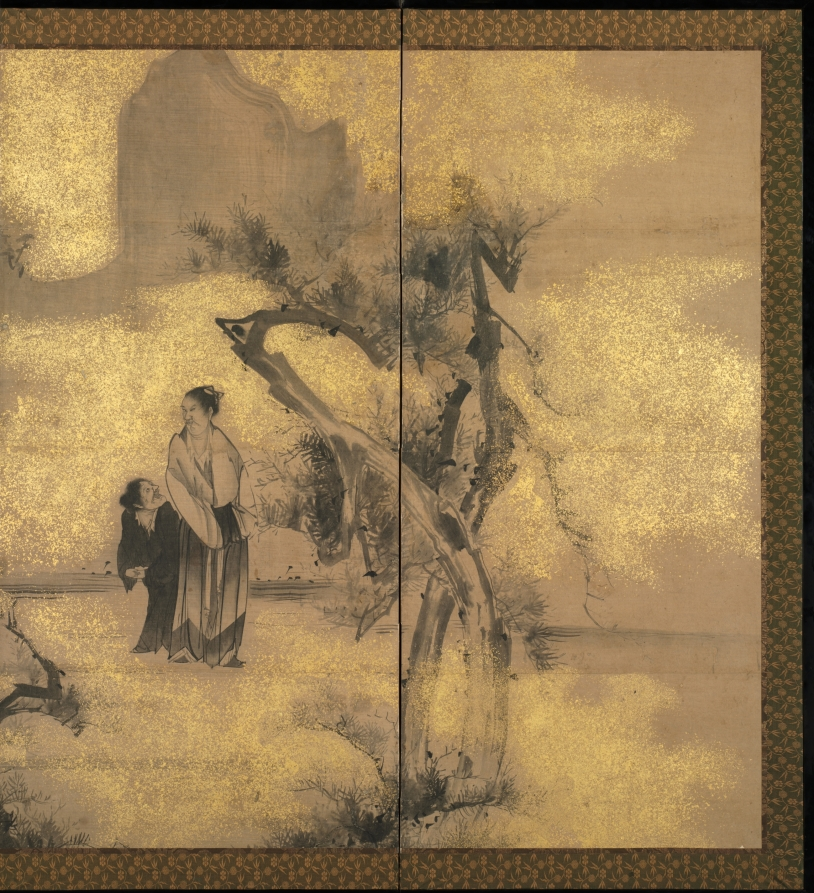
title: The Eight Immortals of the Wine Cup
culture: Japan, Edo period (1615–1868)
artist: Soga Shōhaku (Japanese, 1730–1781)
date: later 1700s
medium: six-panel folding screen, ink and cut-gold foil on paper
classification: Painting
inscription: signature upper left corner.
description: Responding to the desires of the middle class (chonin), some Japanese painters of the late Edo period moved away from the seriousness associated with the Chinese theme of reclusion, focusing instead on the motif’s humorous aspects. The theme Eight Immortals of the Wine Cup is based on a poem by the renowned 8th-century Chinese poet Du Fu about his eight colleagues. These scholars eagerly sought release from their official governmental duties and then supposedly fled the capital for the countryside. There, they engaged in wildly eccentric behavior and adventurous creative work, all fueled by copious amounts of wine. Shohaku’s version of events exaggerates the scholars’ pleasure, as seen in their comical facial expressions.